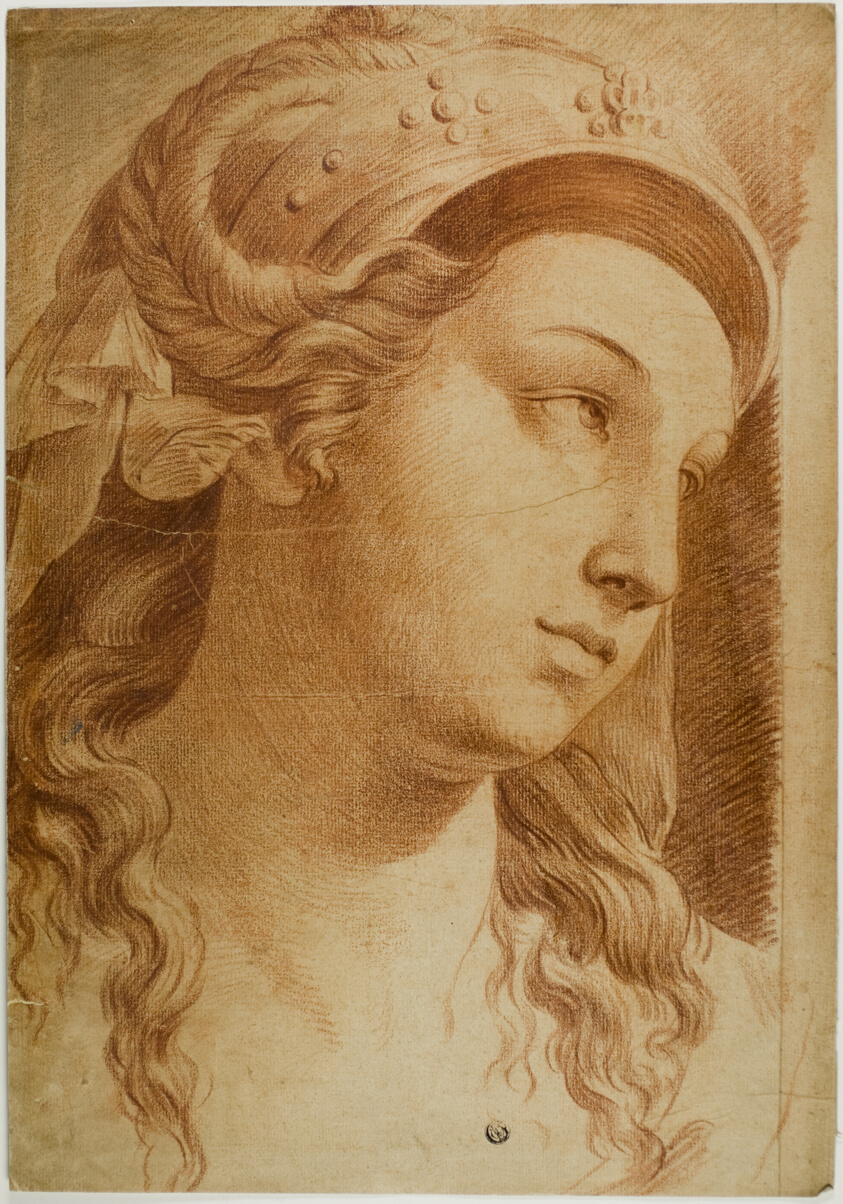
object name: Drawing and Watercolor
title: Head of Comity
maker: After Raffaello Sanzio, called Raphael; Italian, 1483-1520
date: c. 1750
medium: Red chalk on cream laid paper, laid down on cream wove paper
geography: Italy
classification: chalk; drawings (visual works); prints and drawing